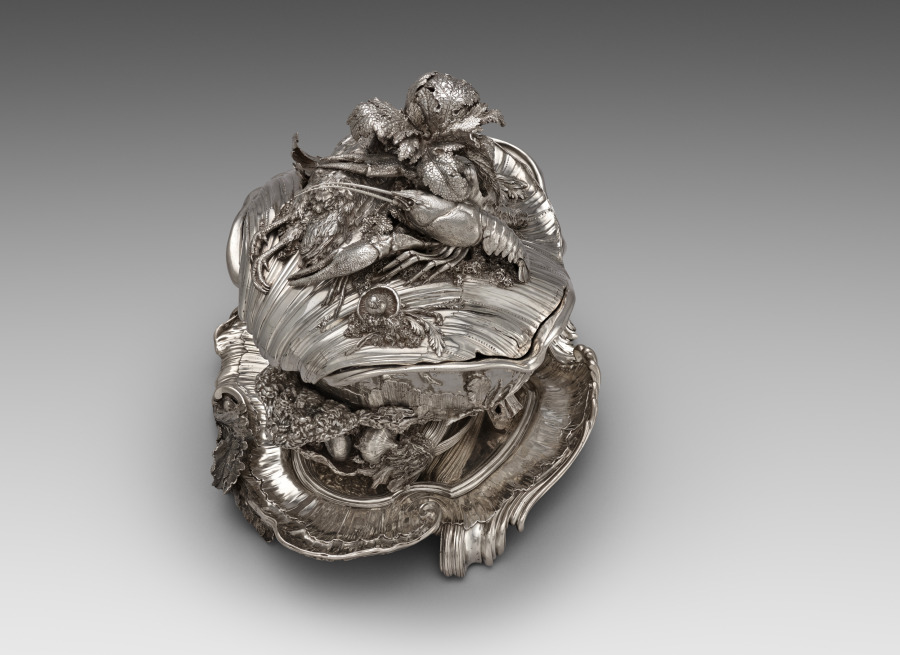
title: Covered Tureen on Stand (Pot-à-oille)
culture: France, Paris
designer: Juste-Aurèle Meissonnier (French, 1695–1750)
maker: Pierre-François Bonnestrenne (French)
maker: Henry Adnet (French, 1745)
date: 1735–38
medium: silver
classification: Silver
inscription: [Maker’s mark of Pierre−François Bonnestrenne, beneath platter; inside tureen (two marks)]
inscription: [Warden's mark for Paris, 1734−1735, beneath platter; inside tureen; inside cover]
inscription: [Charge mark of Hubert Louvet, Paris, 1732-1738, on platter border; beneath platter; beneath tureen; inside cover; inside tureen (two marks)]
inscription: [Discharge mark of Louis Robin mostly used for stamping small work, Paris 1738−1744, on platter border; beneath tureen]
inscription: [Warden's mark for Paris, 1736−1737, on platter border]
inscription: [Possibly British import mark, London, 1925, on platter border]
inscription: [Possibly mark of the British firm Charles & Richard Comyns, on platter border]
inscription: [Discharge of Louis Robin mostly used for stamping gold and silver between 1738 and 1744, beneath tureen; outside cover]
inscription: [Maker’s mark of Henry-Guillaume Adnet, inside cover]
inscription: [Two small undefined marks, inside cover]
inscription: [Under the surface of the platter the engraved signature]: “FAIT-PAR-I-A-MEISSONIER-ARCHITECTTE”; [and the weight] “673=5"; “No. [v] I 50 £ b76Sol”; [and the numbers] “A nº 1”; “A nº2”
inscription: [On tureen lip]: "MEISSONIER"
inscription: [On tureen lip]: “A nº 3”; “A nº2” [in order to place the tureen correctly on the stand]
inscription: [Numbers engraved on the stand, the tureen, and the cover to show how the piece should be assembled]: “A nº 1” [on the base of the tureen; beneath the cover; on the platter], “A nº 2” [on the platter], “A nº 3” [on the exterior rim of the tureen], “A nº4”; “A nº 5” [outside the cover], “A nº 7” [on the border of the platter]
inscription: [Two warden's marks for Paris, 1735-1736, beneath tureen]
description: This tureen exemplifies the French Rococo style, an artistic movement celebrating naturalistic forms that developed in Paris during the early 1700s. In contrast to classical, controlled symmetry, Rococo forms morph, twist, and spill into the space around them. Meissonnier embellished this tureen in a picturesque arrangement of vegetables and creatures, transforming a utilitarian object into a decadent display of wealth and abundance. This masterpiece comes from a set of two tureens commissioned by the English Duke of Kingston during an extended stay in Paris in the 1730s.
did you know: The langoustine, pigeon, and vegetables were cast using real examples giving the silver copies lifelike detail and appearance.